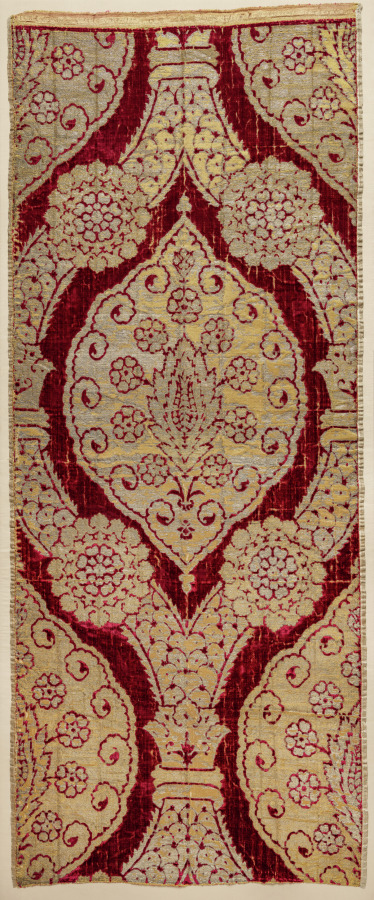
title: Brocaded velvet with medallions in ogival lattice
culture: Turkey, Istanbul or Bursa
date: late 1500s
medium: Silk: velvet, brocaded; gilt- and silver-metal thread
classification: Velvet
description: This luxurious velvet is similar to fabrics worn by Turkish sultans on elaborate ceremonial occasions at the imperial Topkapi Palace in Istanbul during the 1500s. Such bold patterns and high quality served to symbolize the immense power and unfathomable wealth of the Ottoman Empire. The design in this velvet was adapted from Ottoman court art and assembled to create lively contrasts between large motifs seen from a distance—medallion and lattice—and small designs that can only be admired up close—flowers and crowns.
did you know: The velvet was probably used as an upholstery fabric, part of an opulent cover for a divan (sofa) at the palace.